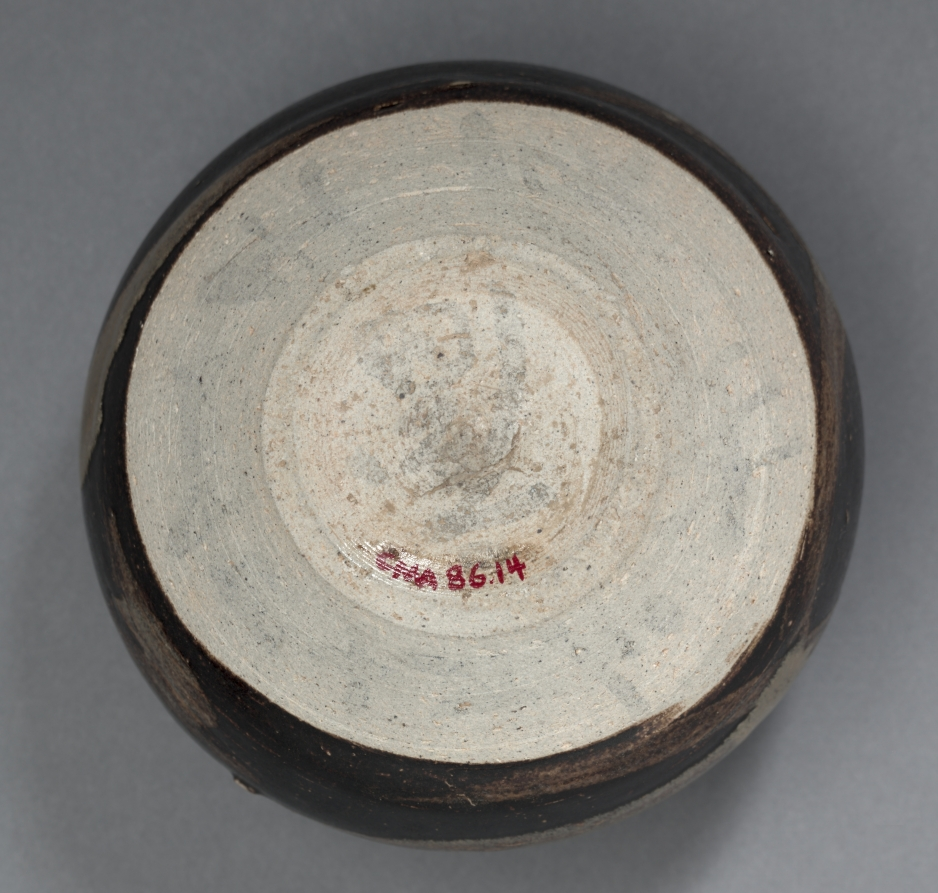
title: Jar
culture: China, Jiangxi province, Jizhou kilns, Southern Song Dynasty (1127–1279) - Yuan Dynasty (1271–1368)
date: 1200s–1300s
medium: Glazed stoneware with resist and slip-painted decoration, Jizhou ware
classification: Ceramic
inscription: jen ch'en nien san yüeh shih jih mai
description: Like the Teabowl with Tortoiseshell Glaze (CMA 2020.177), this jar was made in the Jizhou kilns of southeast China. Producing a variety of innovative dark glaze types, the potter here created a dynamic abstract pattern of waves in the form of light brown strokes brushed over a dark brown glaze.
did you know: To create leaf imprints in Jizhou ware, artisans dipped real leaves in glaze and placed them on vessels, where the leaves would then burn away while firing in the kiln.